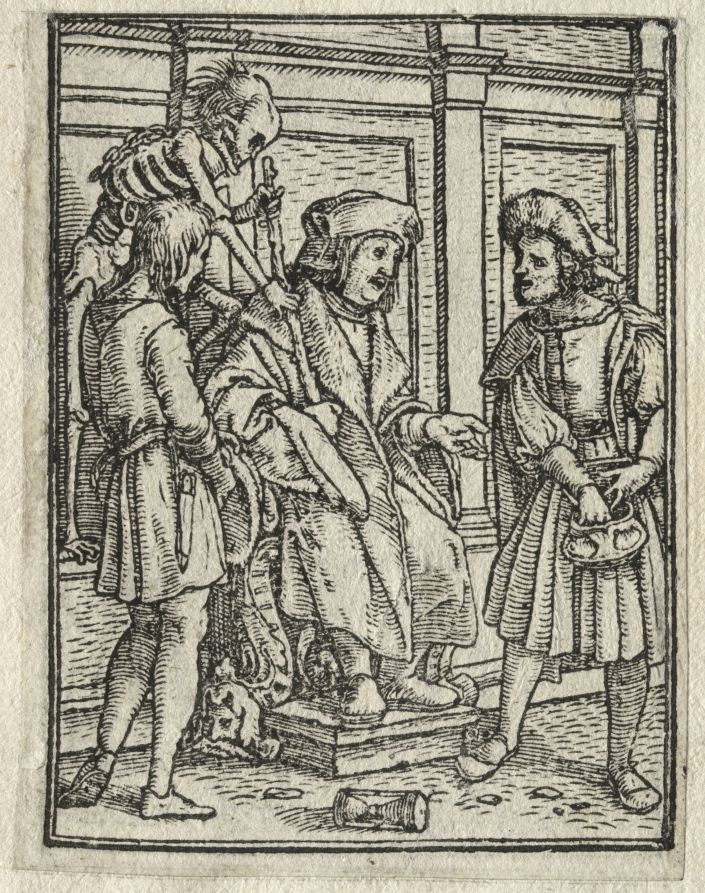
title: The Dance of Death: The Judge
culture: Germany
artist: Hans Holbein the Younger (German, active England and Switzerland, 1497/98–1543)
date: c. 1526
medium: woodcut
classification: Print